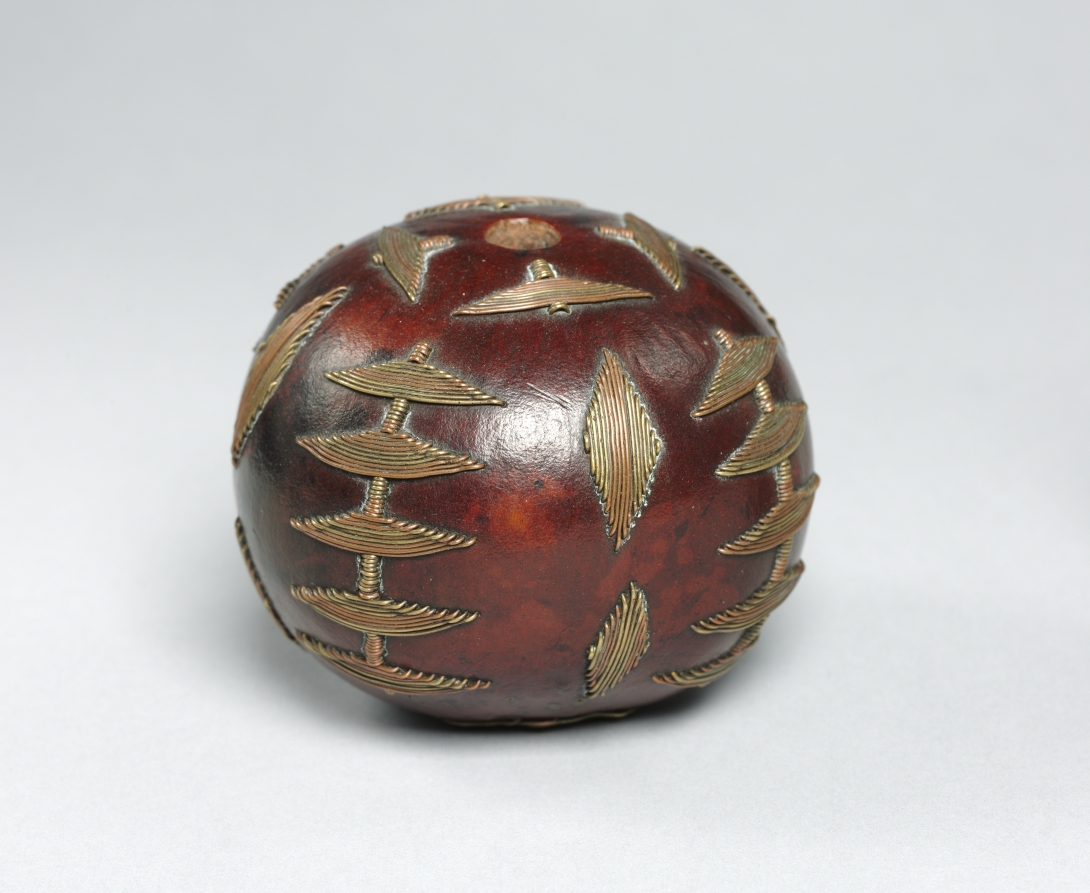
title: Snuff Container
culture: Africa, Southern Africa, South Africa, Zimbabwe or Mozambique, Northern Nguni-style or Shona-style maker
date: 1800s–1900s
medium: Gourd and copper alloy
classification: Vessels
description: The shape and material of gourd snuff containers—like a woman’s womb, the gourd contains and nurtures the seed—suggest they were made for female users and allude to procreation and fecundity.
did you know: The snuff and tobacco held in this container were believed to enable communication between humans and ancestors.